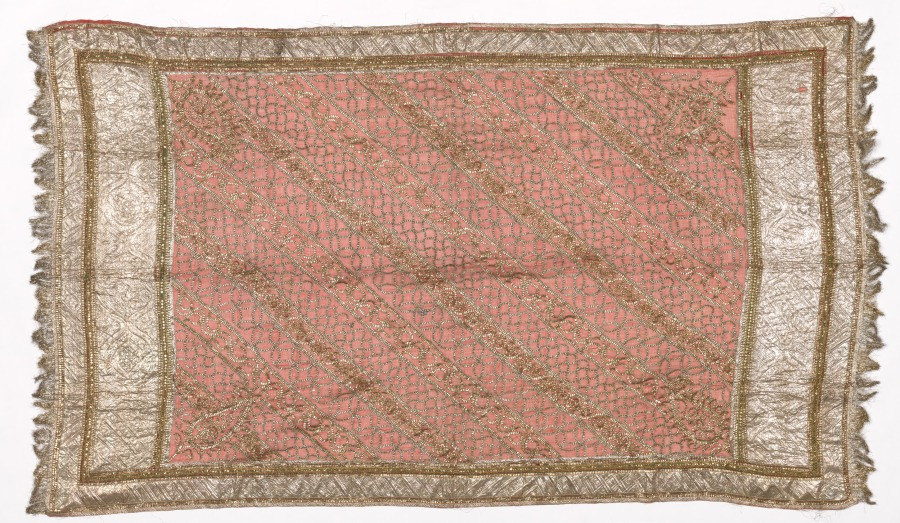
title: Embroidered Sari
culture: India, Patna, 19th - early 20th century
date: 1800s - early 1900s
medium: embroidery; silk and metal thread and sequins on cotton tabby ground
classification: Embroidery